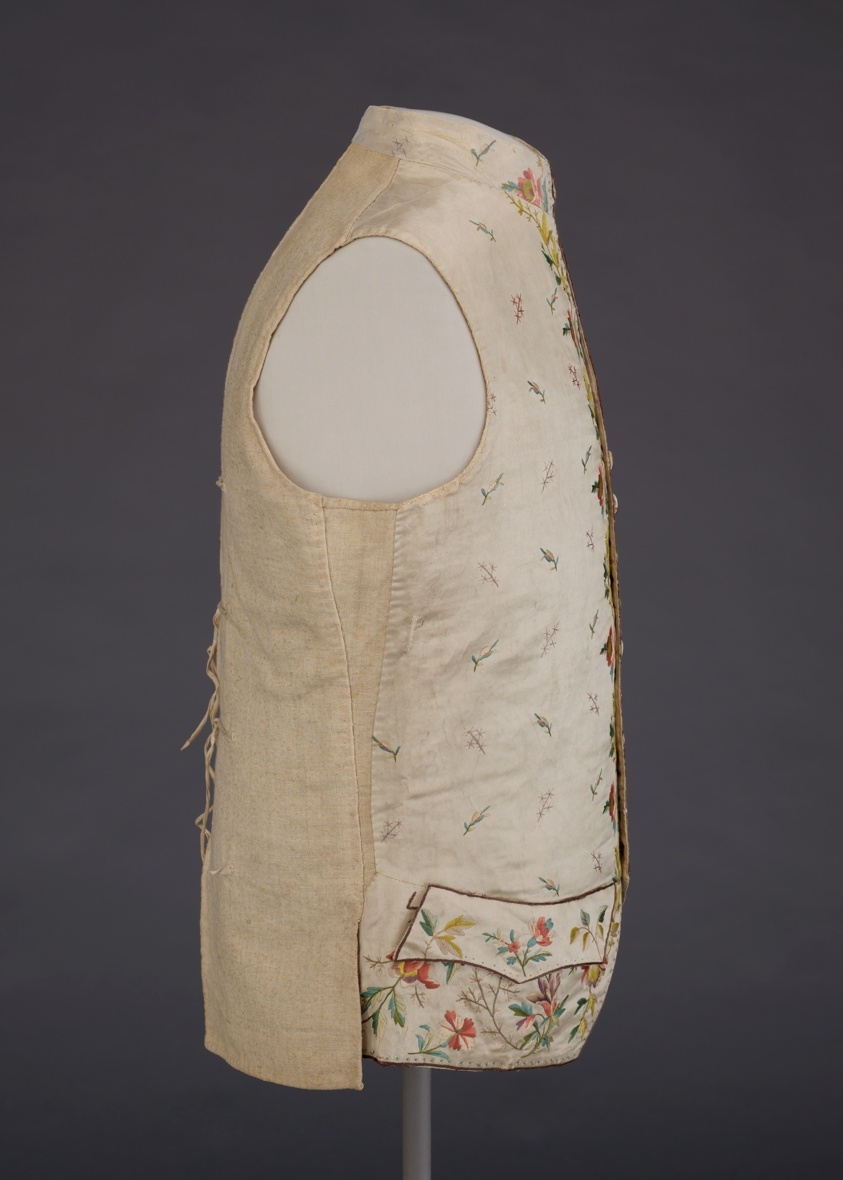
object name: Costume and Accessories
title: Man's Waistcoat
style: 18th Century, Rococo, Neoclassicism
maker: Possibly Lyon, France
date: Embroidered 1780s; altered 1795–1805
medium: Front: Silk, satin-weave foundation, embroidered with silk thread in satin, steam and buttonhole stitches and French knots; embroidered fabric covered buttons; silk, twill weave lining; back: linen, plain weave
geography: France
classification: waistcoat (garment); costume; needlework (visual works); dress (garment); clothing; textile; costume - embroidery; garment; costume - needlework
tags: flowers, roses, fashion, floral, floral motifs